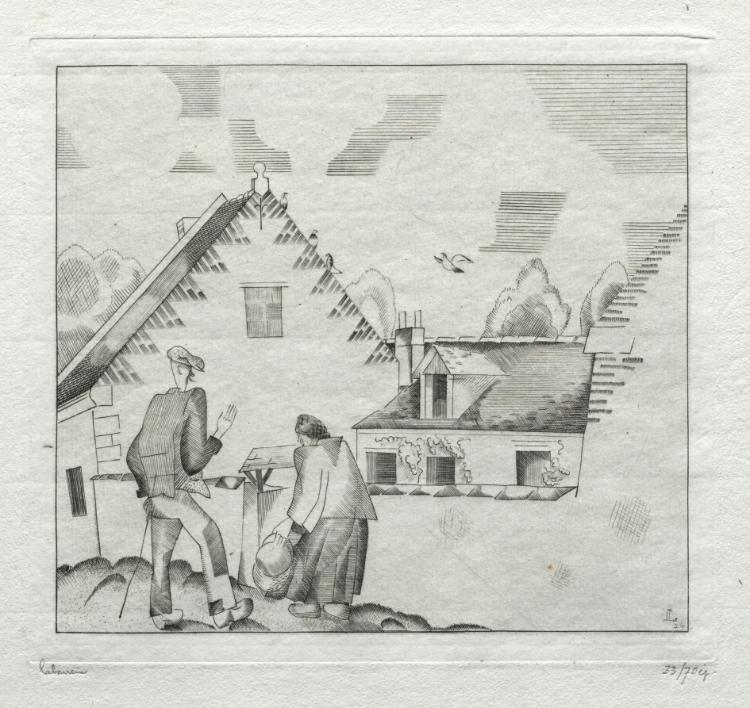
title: Villagers, Chatting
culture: France, 20th century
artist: Jean-Émile Laboureur (French, 1877–1943)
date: 1924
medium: engraving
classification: Print